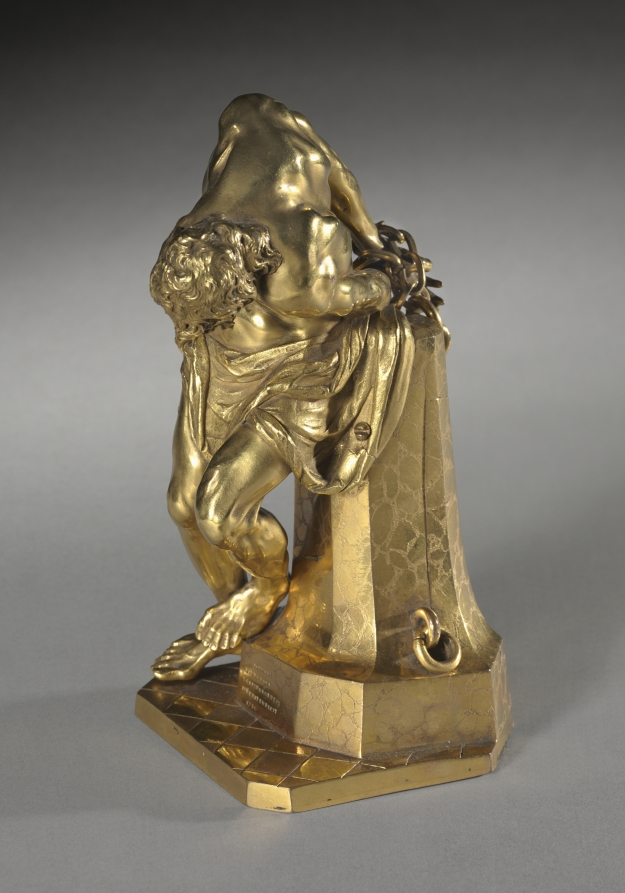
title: Christ at the Column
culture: Austria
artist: Johann Baptist Hagenauer (Austrian, 1732–1810)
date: 1756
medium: gilt bronze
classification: Sculpture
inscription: at base of stake: IOANNES HAGENAUER SALISBURGENSIS INVENIT ED FECIT 1756.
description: Considered to be one of the masterpieces of his youth, Hagenauer cast this bronze while a student at the Vienna Academy, where he studied between 1754 and 1759. The authorship and date is verified by an inscription found at the base of the stake: IOANNES HAGENAUER SALISBURGENSIS INVENIT ED FECIT 1756. This signature appears on several of Hagenauer's early works.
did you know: With the energy of the imbalanced composition, Hagenauer emphasizes this heightened moment of the Passion of Christ.